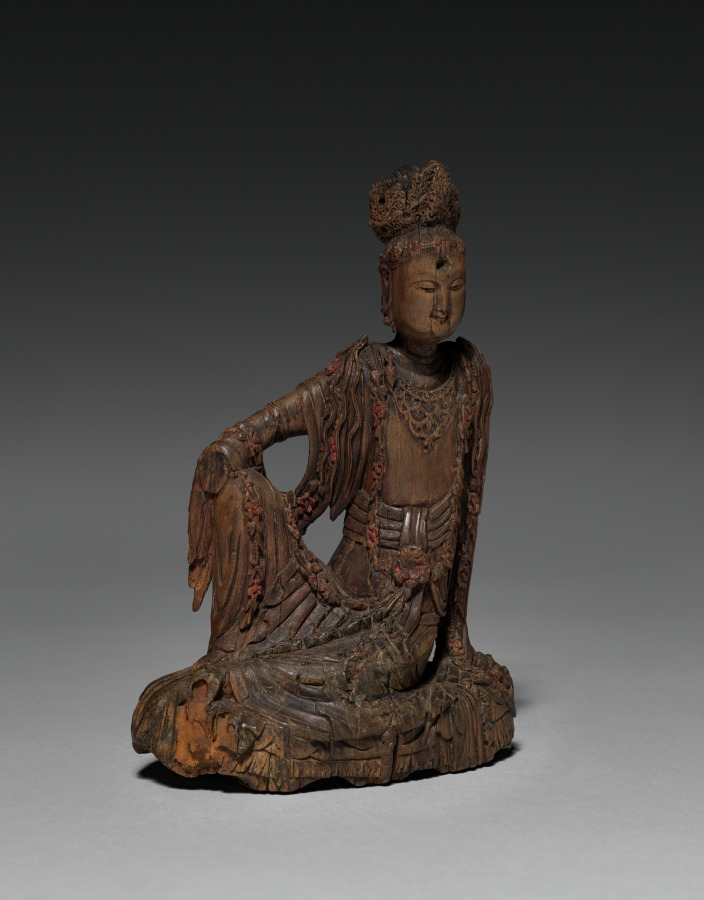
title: Potalaka Guanyin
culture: China, Five dynasties (907-960)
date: 900s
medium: Carved sandalwood with traces of paint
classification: Sculpture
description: This portable figure of Guanyin, the Bodhisattva of Compassion who vowed to stay on earth to help human beings, is carved of precious sandalwood. It is lavishly covered with garlands of flowers that retain traces of the original red paint. The small sculpture may have been used in a private devotional context.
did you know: Mount Potala is the mythical home of the bodhisattva Avalokiteśvara, called Guanyin in Chinese.